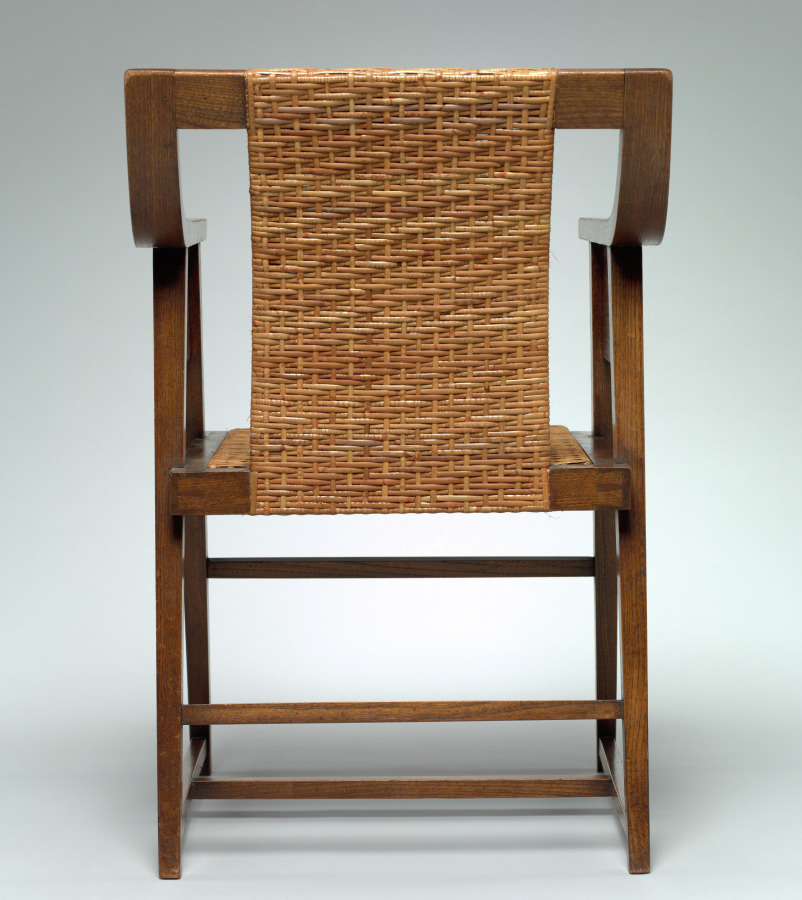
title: Armchair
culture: Austria, Vienna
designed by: Hans Vollmer (Austrian, 1879-)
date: c. 1904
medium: oak with replacement upholstered slip seat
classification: Furniture and woodwork